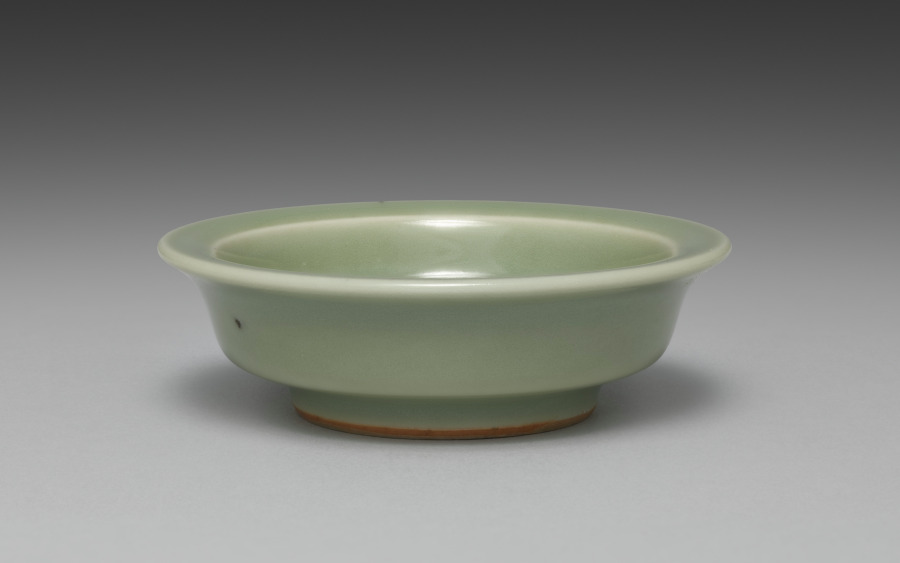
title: Saucer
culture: Japan, Meiji period (1868–1912)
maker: Seifū Yohei III (Japanese, 1851–1914)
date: 1893–1914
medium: One from a set of ten dishes; porcelain with green glaze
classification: Ceramic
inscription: 清風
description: Yohei III’s main output for his sophisticated clientele was in the form of tea sets and dining sets. He created a range of dishes in green glazes. He often produced in pairs, sets of five, or sets of ten. For this set of ten small dishes in a simple, round form that emphasizes the glaze above all, the box lid designates the piece as seiji, or green-glazed porcelain, using a general term for the extensive palette of green glazes often called celadon in English. The box lid further identifies the dishes themselves as tōchō, literally “bean-sized saucers,” a size that makes them suitable for dipping sauces.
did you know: The ten dishes in this set are stored in stacks of five in a two-compartment box.